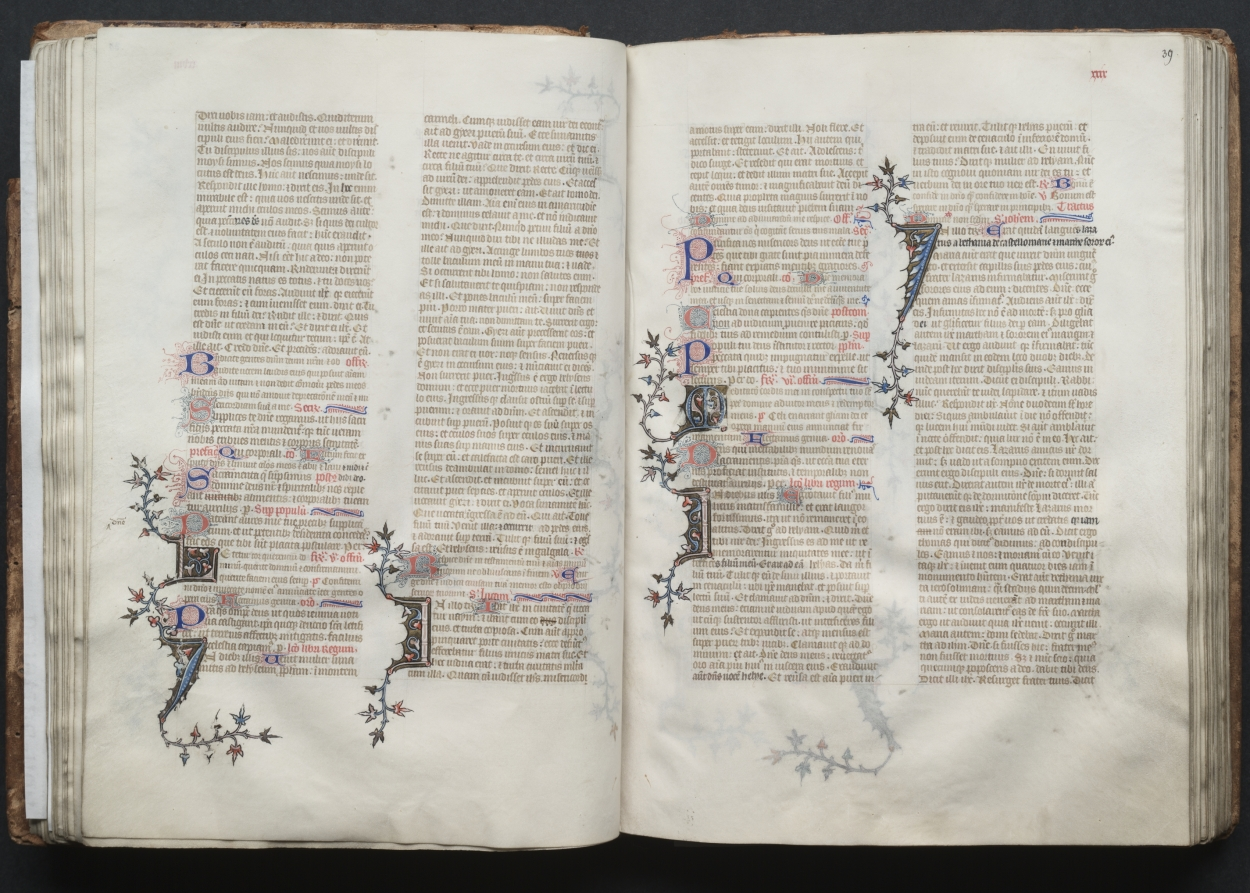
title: The Gotha Missal: Fol. 38v, Text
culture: France, Paris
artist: Master of the Boqueteaux (French)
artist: and Workshop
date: c. 1375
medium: ink, tempera, and gold on vellum; blind-tooled leather binding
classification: Bound Volume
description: The style and quality of this manuscript's decoration is typical of deluxe Parisian books made for aristocratic or royal patrons. Most of the book's decoration appears to be the work of the Master of the Boqueteaux, an artist active at the court of King Charles V (died 1380). His style was apparently shared by a number of book illuminators working in and around Paris. It is very possible that the Gotha Missal belonged to Charles V, but is not provable because the manuscript has no royal portraits and lacks a colophon. Given the book's magnificent decoration, however, it would seem that it was produced for a Valois prince, if not for the king himself. The manuscript receives its name from the German dukes of Gotha, its later owners.